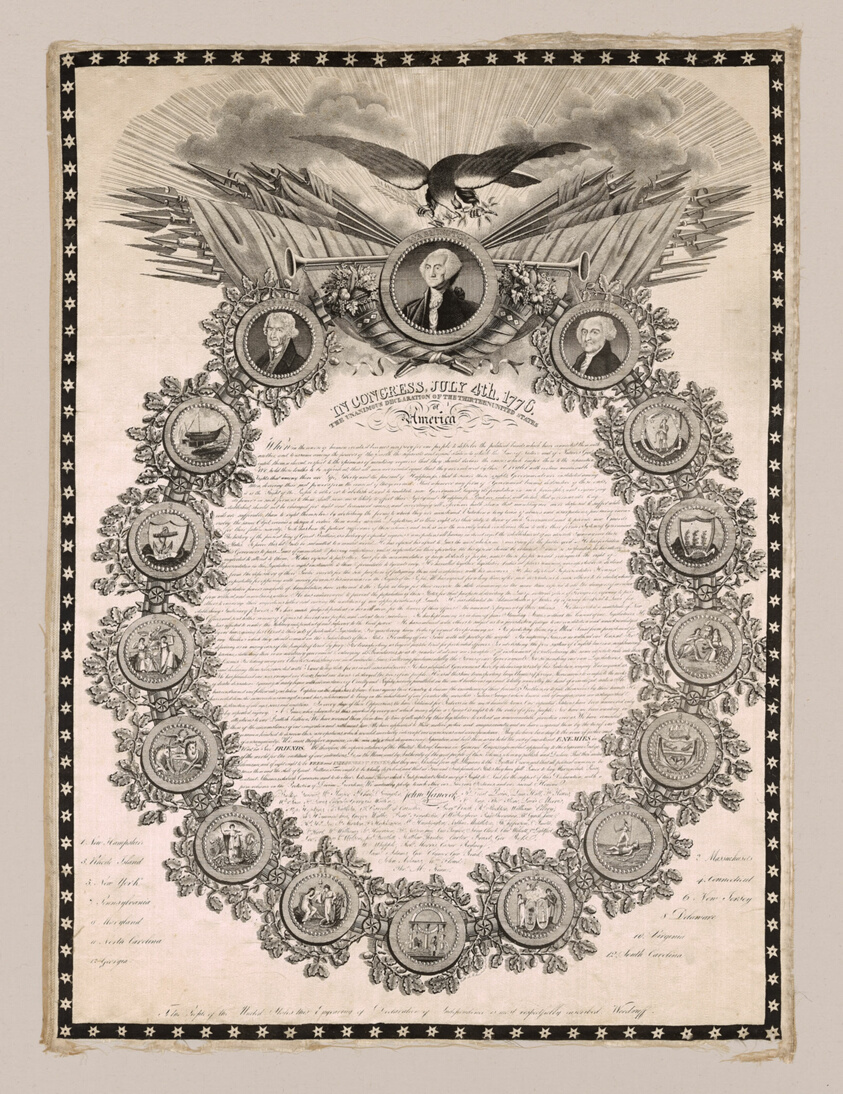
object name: Textile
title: Panel (Furnishing Fabric)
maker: Manufactured by H. Brunet et Cie. (French); France, Lyon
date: 1820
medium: Silk, warp-float faced satin weave; copperplate printed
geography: Lyon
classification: textile; weaving - printed; furnishing textile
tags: propaganda